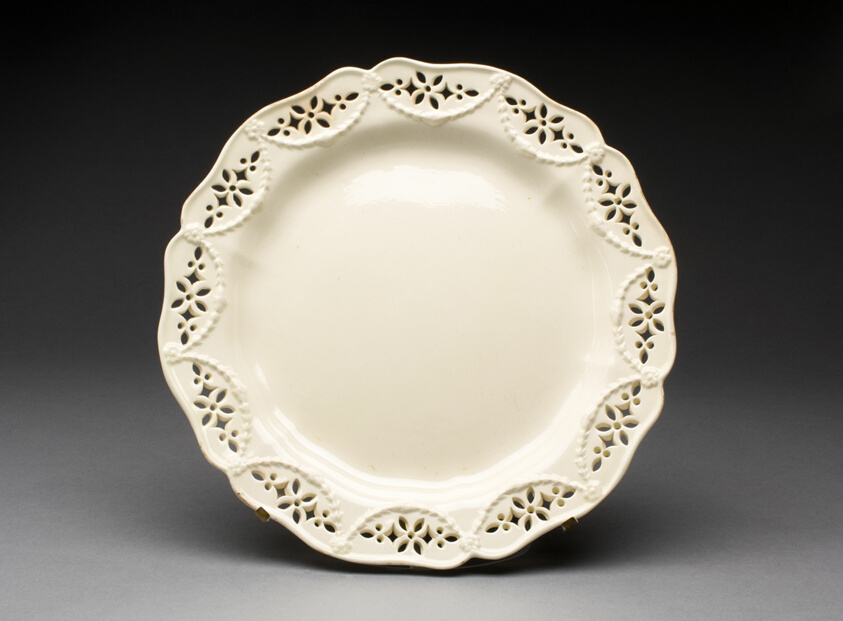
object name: Ceramics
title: Plate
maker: England, Leeds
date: 1780/90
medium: Lead-glazed earthenware (creamware)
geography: Leeds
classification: plate (general, dish); dish (vessel); earthenware; ceramics; european decorative arts; creamware; lead-glazed earthenware